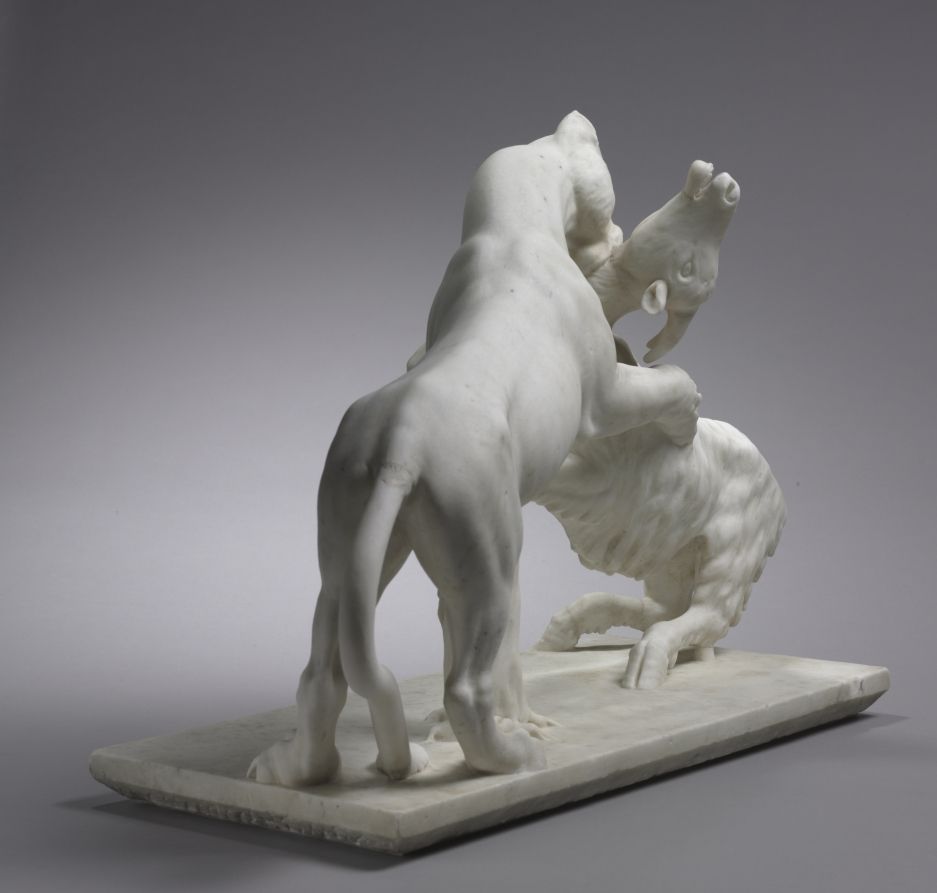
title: Panther Attacking a Goat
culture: Italy, 18th century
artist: Francesco Antonio Franzoni (Italian, 1734–1818)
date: late 1700s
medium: marble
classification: Sculpture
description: One of the best known restorers of ancient sculpture, Francesco Franzoni often invented totally new compositions from small fragments. However, this sculpture is entirely Franzoni’s own work, down to the breaks seen in such places as the panther’s tail and the goat’s legs and jaw. Curiously, Franzoni based this work on one of his own restorations, now in the Vatican, although his composition here is more balanced and elegant, in keeping with ideas in the late 1700s about how ancient sculpture should look.